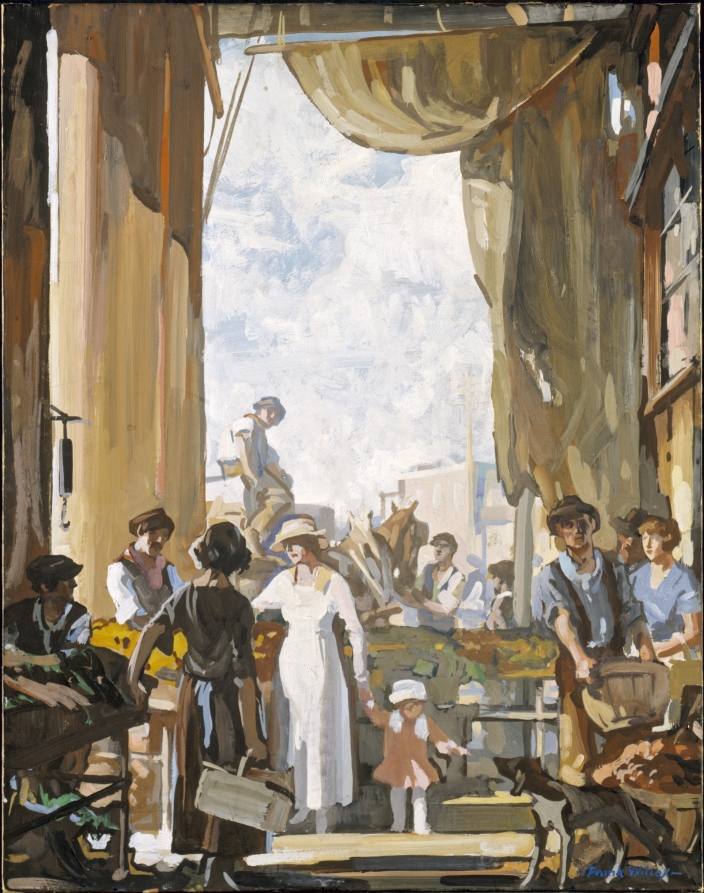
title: The Old Market, Cleveland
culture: America, Ohio, Cleveland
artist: Frank Wilcox (American, 1887–1964)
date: 1920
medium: gouache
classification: Drawing